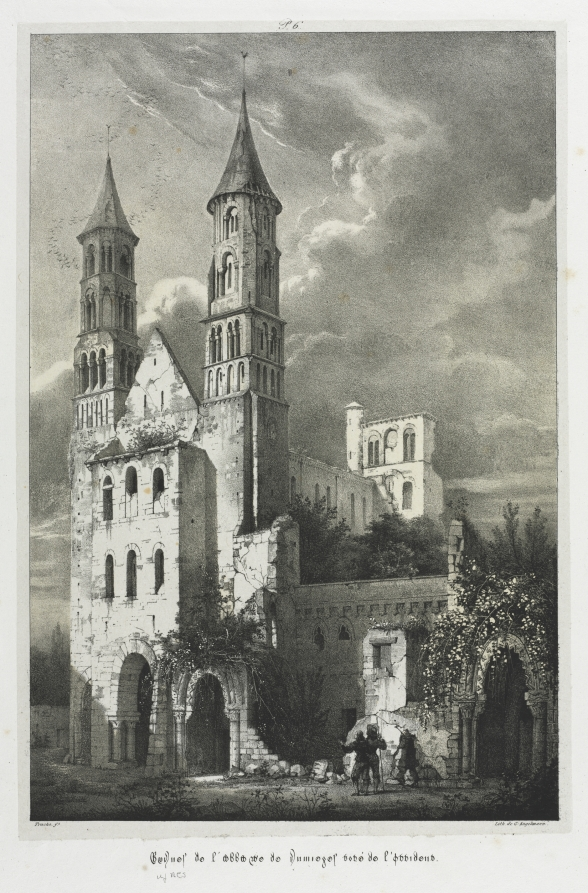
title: Ruins of the Abbey of Jumièges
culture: France, 19th century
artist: Jean Truchot (French, 1798–1823)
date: c. 1820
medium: lithograph with gray tint stone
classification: Print